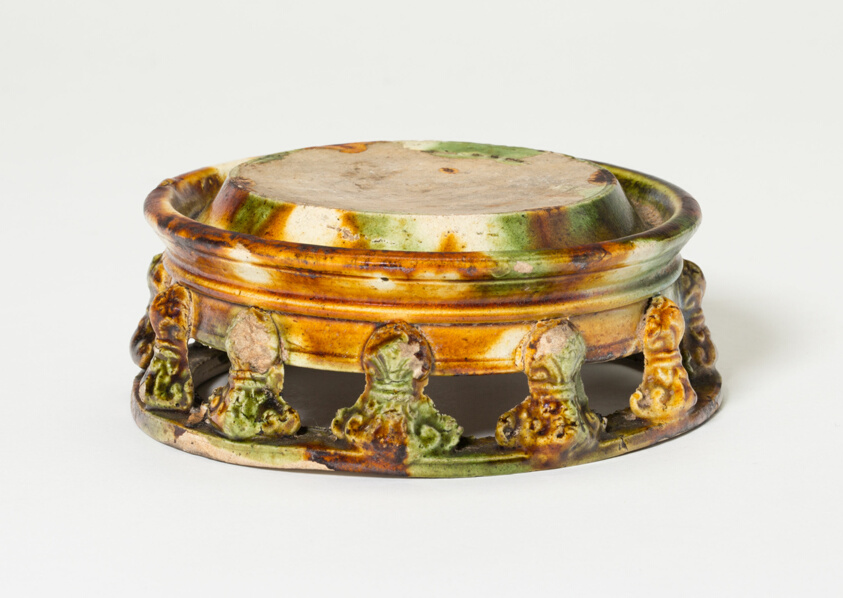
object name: Funerary Object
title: Model of an Inkstone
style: Chinese (culture or style)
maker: China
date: Tang dynasty (618–907), first half of 8th century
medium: Earthenware with three-color (sancai) lead glazes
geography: China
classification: earthenware; asian art; ceramics